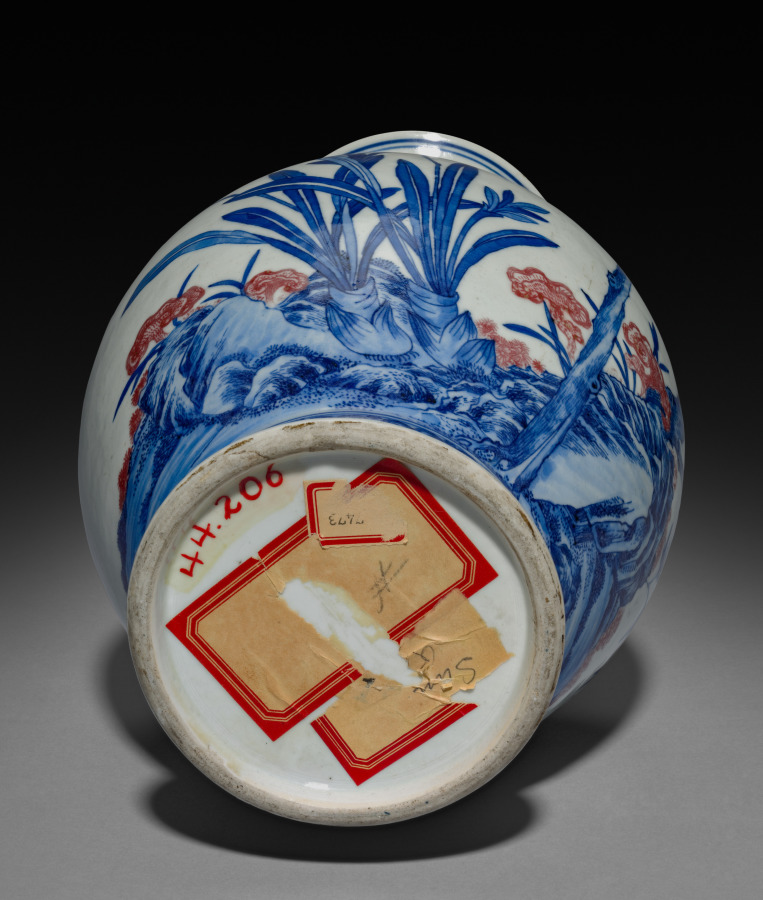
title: Vase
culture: China, Jiangxi province, Jingdezhen kilns, Qing dynasty (1644-1911), Yongzheng reign (1723-35)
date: 1723–35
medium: porcelain with underglaze blue and red decoration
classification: Ceramic